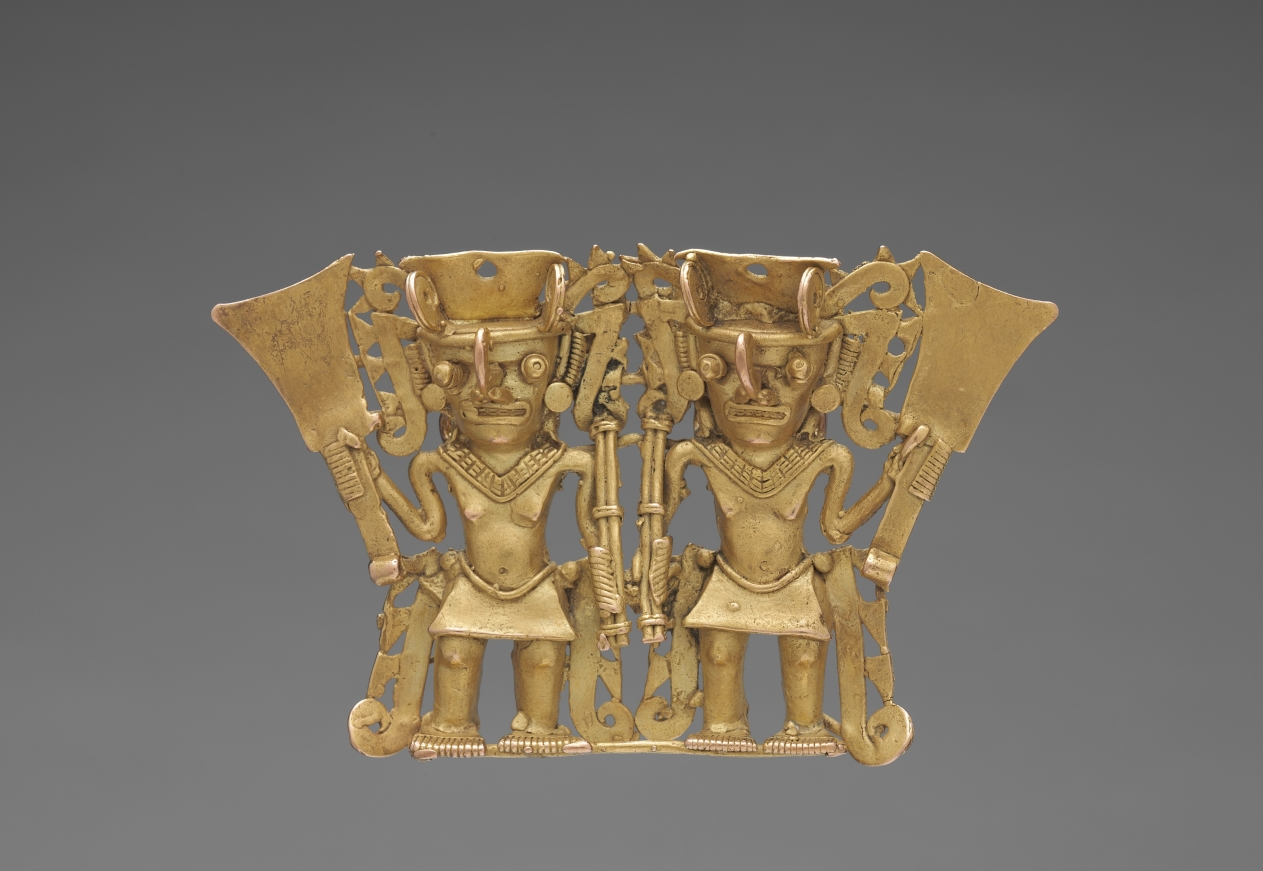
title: Bat-Nosed Figures Pendant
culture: Panama, Azuero Peninsula, Parita style, 11th-16th century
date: 1000–1550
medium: cast gold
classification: Metalwork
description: Both pendants depict paired figures with tusklike noses. The "tusks" perhaps refer to the upswept nose of the leaf-nosed bat, an agile hunter whose "leaf" helps it to snatch prey from midair. The bat's success as a hunter is part of the reason that some identify such paired figures as warriors. They each hold a paddle-shaped object; the larger pair, in elaborate costumes, also clutches staffs.